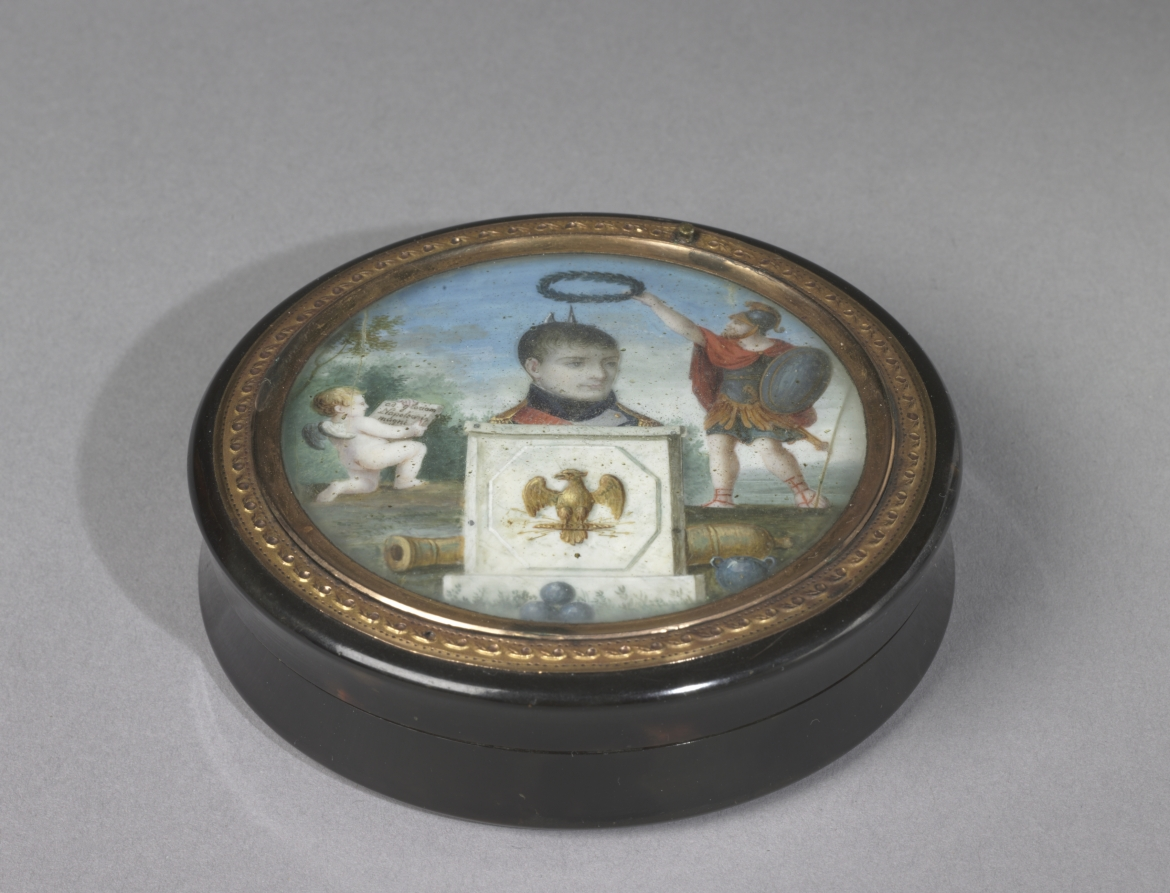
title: Snuff Box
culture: Switzerland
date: early 1800s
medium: tortoiseshell with painted automaton miniature under glass mounted in gold on gilt metal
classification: Miscellaneous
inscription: the putto on the left holds a tablet bearing the inscription: "ad gloriam Napoleonis magni" (glory to the great Napoleon).